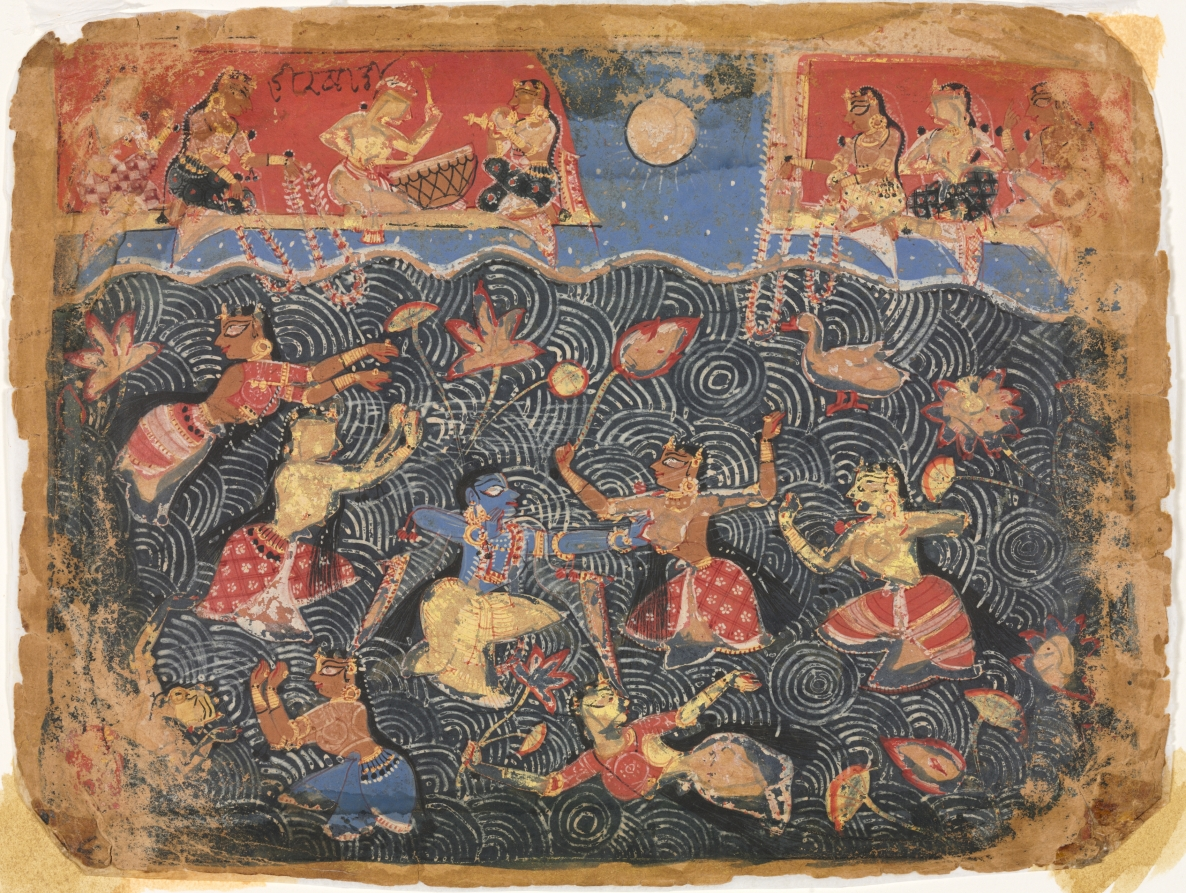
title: Krishna sporting with the gopis in the Jumna River, from a Bhagavata Purana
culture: Northern India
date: c. 1525–40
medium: Gum tempera and ink on paper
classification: Painting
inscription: [[recto, upper left corner]] Hlrabal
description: Abstract concentric circles depict water churned up by the gopis, or cowherd women, who are swimming and playing with joy and abandon. In their midst, the blue-skinned Krishna reaches for a gopi’s breast. Their love play is celebrated by celestial beings in the sky who offer flower garlands and beat on a drum. Every figure’s face is shown in profile—a hallmark of Indian painting of the early 1500s perpetuated by artists wishing to emphasize Indian rather than Persian depictions of the human form.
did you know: This page is from one of the earliest surviving illustrated Hindu manuscripts on the life of Krishna, an incarnation of Vishnu.